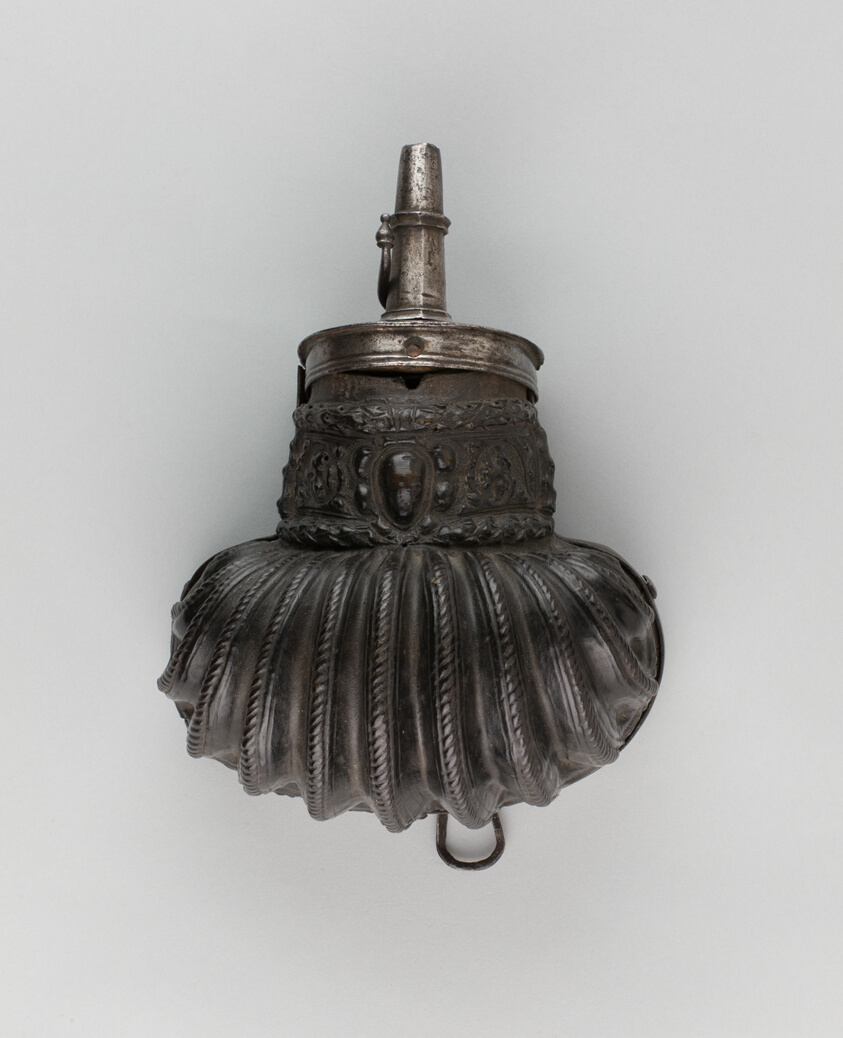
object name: Arms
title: Powder Flask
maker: Italian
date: 1550/1575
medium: Wood, leather, embossed, molded and tooled, and iron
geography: Italy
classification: firearm-accessory; arms; arms and armor